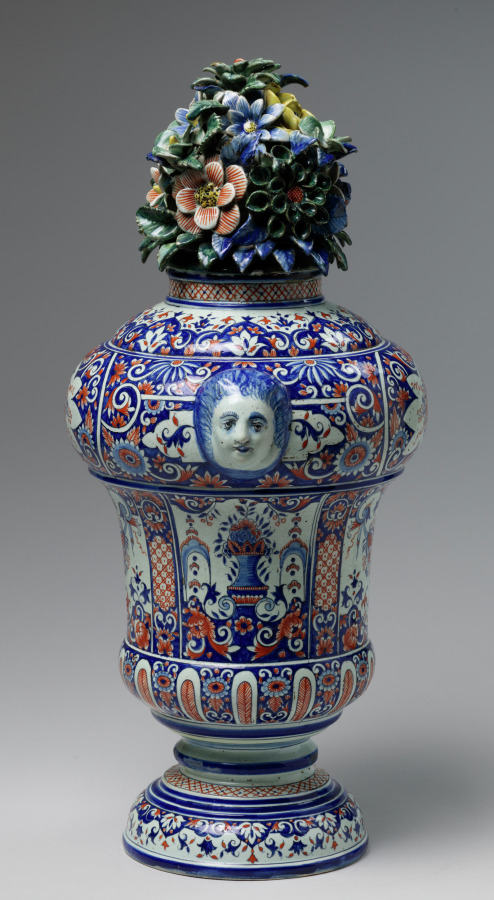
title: Vase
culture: France, Paris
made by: Samson & Co. (French)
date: early 1900s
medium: faience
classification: Ceramic